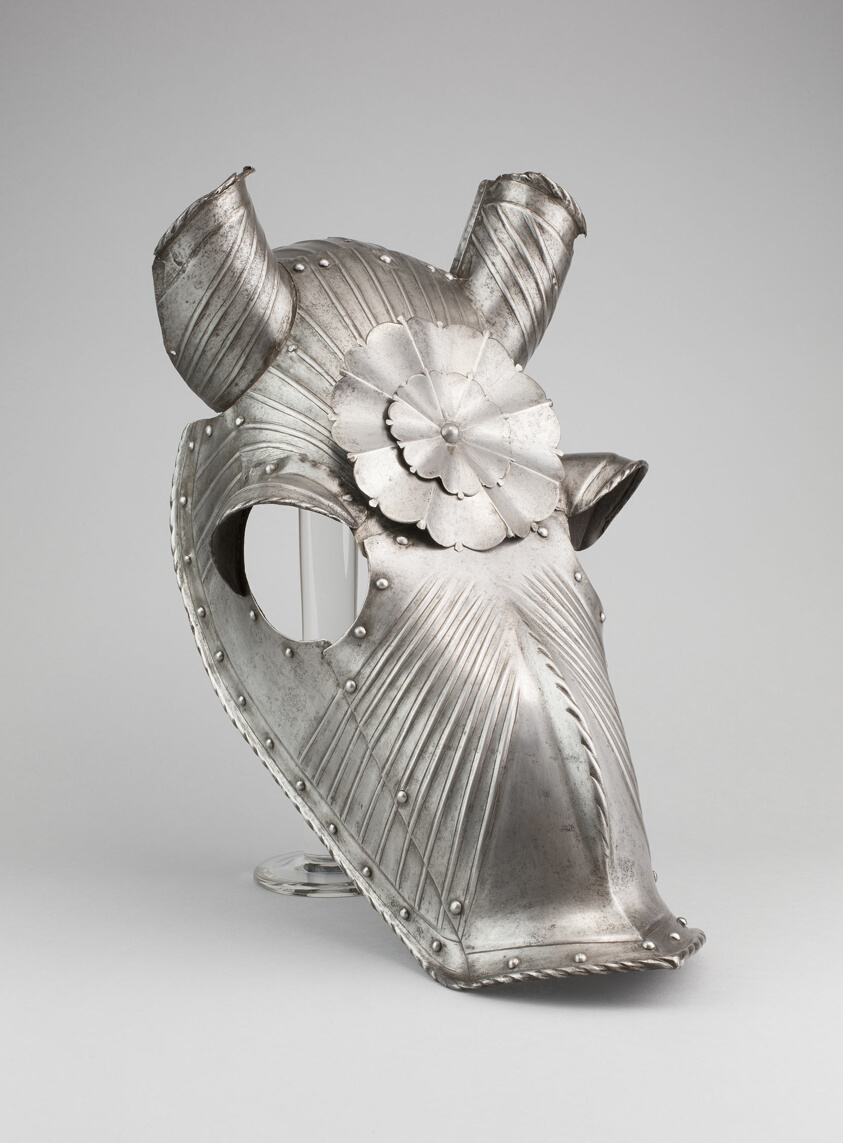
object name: Armor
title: Shaffron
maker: Southern German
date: c. 1520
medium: Steel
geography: Southern Germany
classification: horse equipment; armor; arms and armor